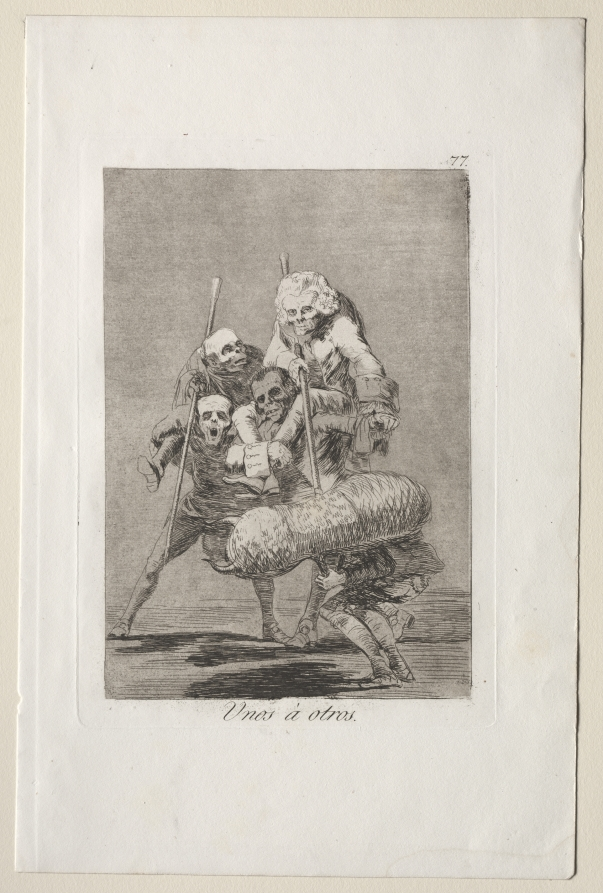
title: What One Does to Another, Plate 77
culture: Spain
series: Los Caprichos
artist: Francisco de Goya (Spanish, 1746–1828)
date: 1799 (printed c. 1855)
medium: etching and aquatint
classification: Print